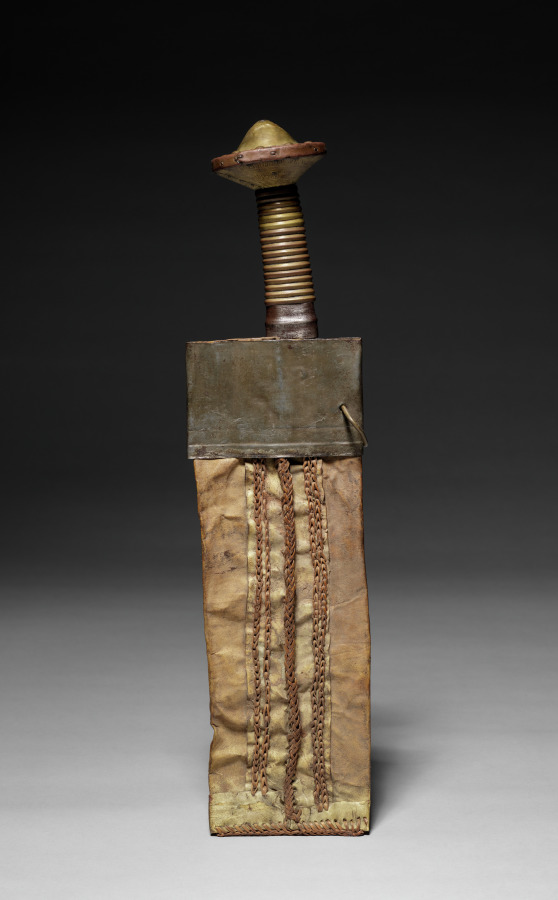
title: Knife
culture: Africa, Central Africa, Democratic Republic of Congo, unknown maker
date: 1800s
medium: Iron, wood, copper alloy, metal, rawhide, and plant fiber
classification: Arms and Armor